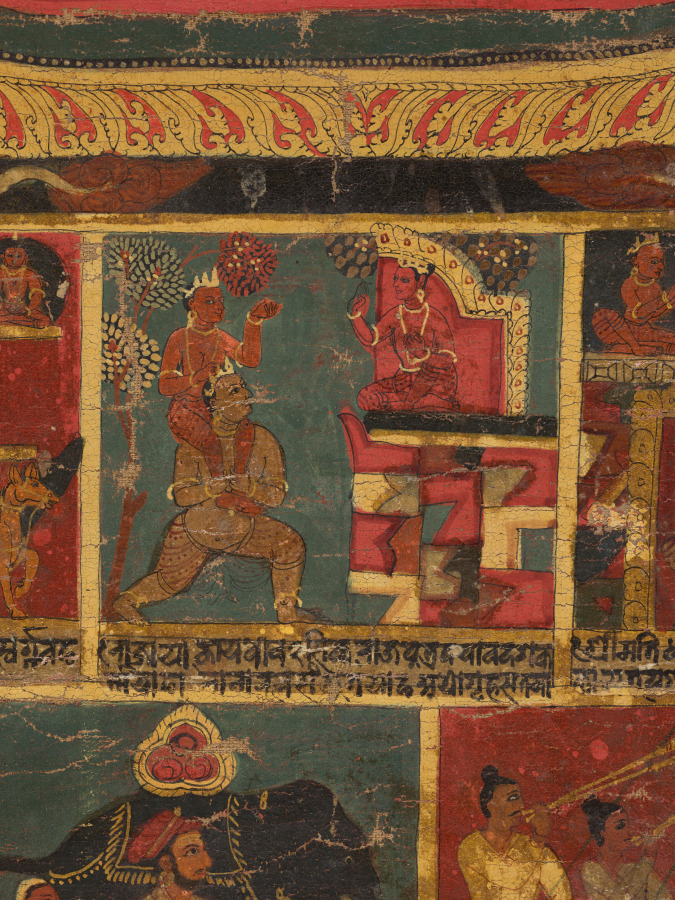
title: Bejeweled Buddha Preaching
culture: Nepal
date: 1648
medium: Gum tempera, ink, and gold on cloth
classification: Painting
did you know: Nepalese devotional paintings on cloth are called "paubha" in the Newari language.